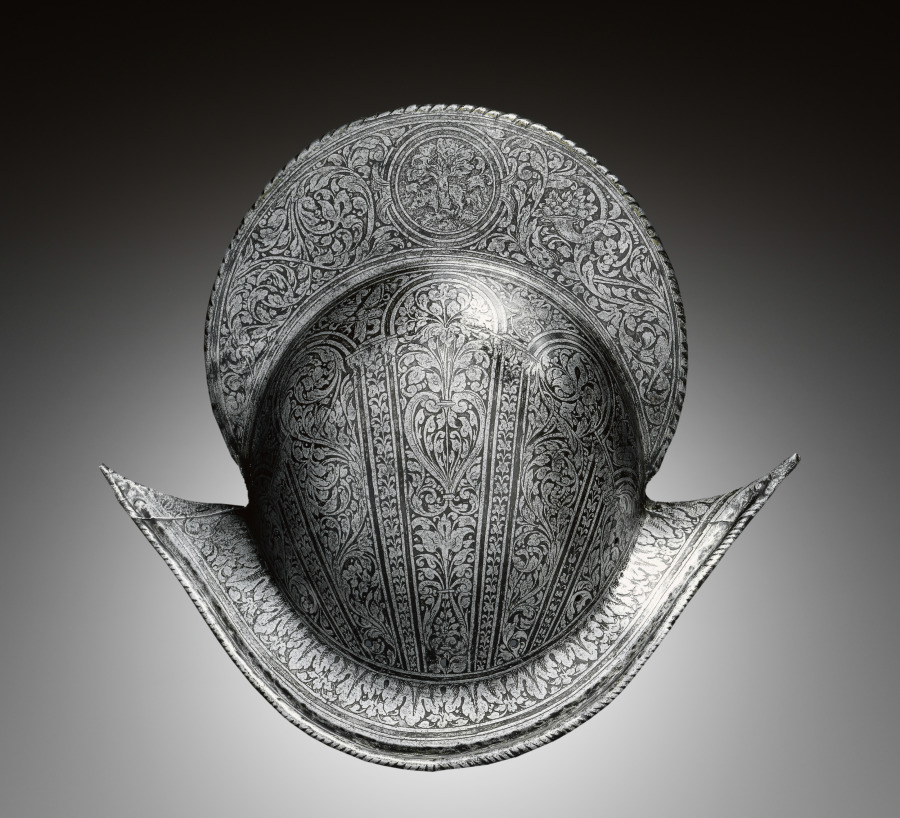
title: Morion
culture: North Italy, late 16th Century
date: c. 1575–1600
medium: steel with etched floral motif and medallion (on comb) with boar under oak tree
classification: Arms and Armor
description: The morion, an open helmet characterized by a tall comb and curved brim peaking before and after, was popularly associated with the Spanish conquistadors in the New World. In fact, morions were worn by infantry and light horsemen throughout Europe. They were also commonly worn by palace guards and thus often were decorated. This example has been beautifully etched over its entire surface. Armor this exquisitely decorated would not have been worn in battle, but used by palace guards for ceremonies and display.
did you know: Amongst the swirling floral patterns on this helmet, there is scene of a boar under a tree in the center medallion of the comb that tops the helmet.